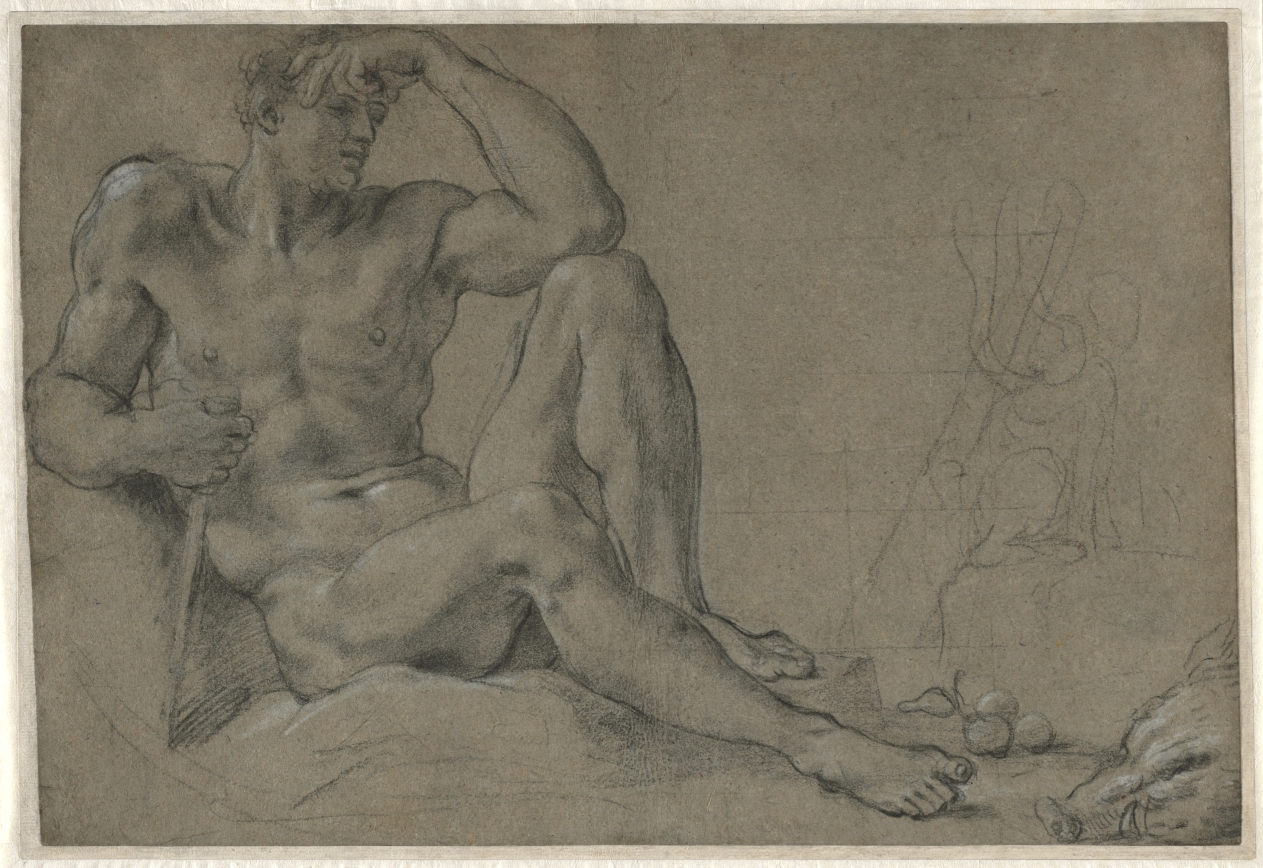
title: Hercules Resting (recto)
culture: Italy, 16th century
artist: Annibale Carracci (Italian, c. 1560–1609)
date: 1595–97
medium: black chalk heightened with white, squared in black chalk on right, incised (edges of figure)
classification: Drawing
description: To atone for the crime of killing his family, the Greek hero Hercules was required to perform twelve labors. In this final study for a fresco of this subject commissioned by Cardinal Odoardo Farnese for the ceiling of his study in his family’s Roman palace, Hercules rests, surrounded by evidence of his toil: the head of the Erymanthian boar he captured, the three golden apples of the Hesperides, and the hide of the Nemean lion on which he sits. The hero’s pose and exaggerated musculature are a result of the artist’s intense study of ancient models, and emulate specific antique sculptures depicting river gods in the Farnese collection. Carracci also worked with full knowledge of Michelangelo’s frescoes on the Sistine Chapel ceiling (1508-10), and the pose of Hercules may have been inspired by the reclining figure of Adam in Michelangelo's Creation of Adam scene.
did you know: The squares drawn lightly over this composition suggest that it was used to transfer the design to another surface such as a full-scale cartoon.